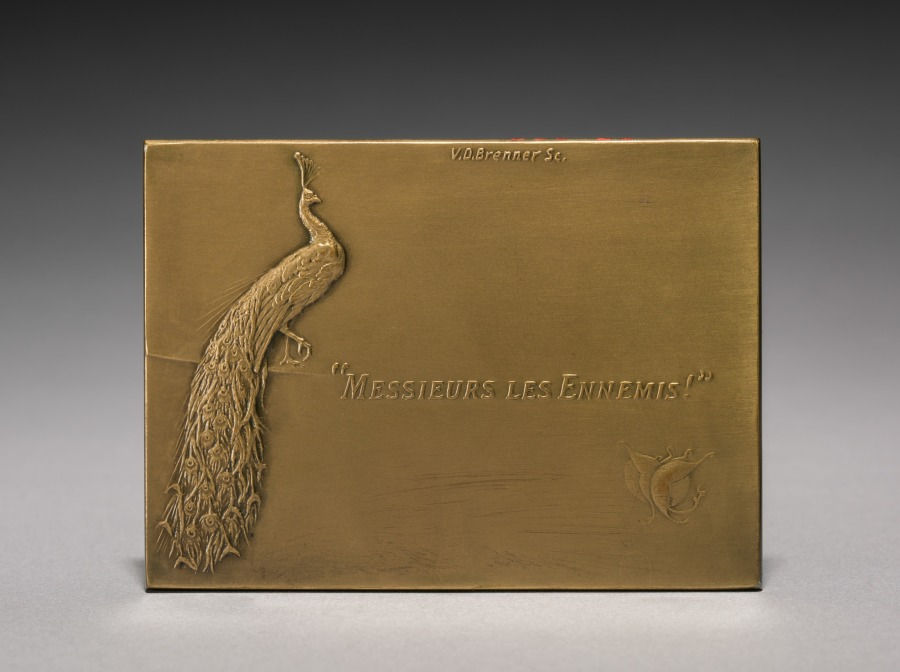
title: Whistler Medal (reverse)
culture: America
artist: Victor D. Brenner (American, 1871–1924)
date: 1900s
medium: bronze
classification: Metalwork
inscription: "Messieurs les Ennemis."